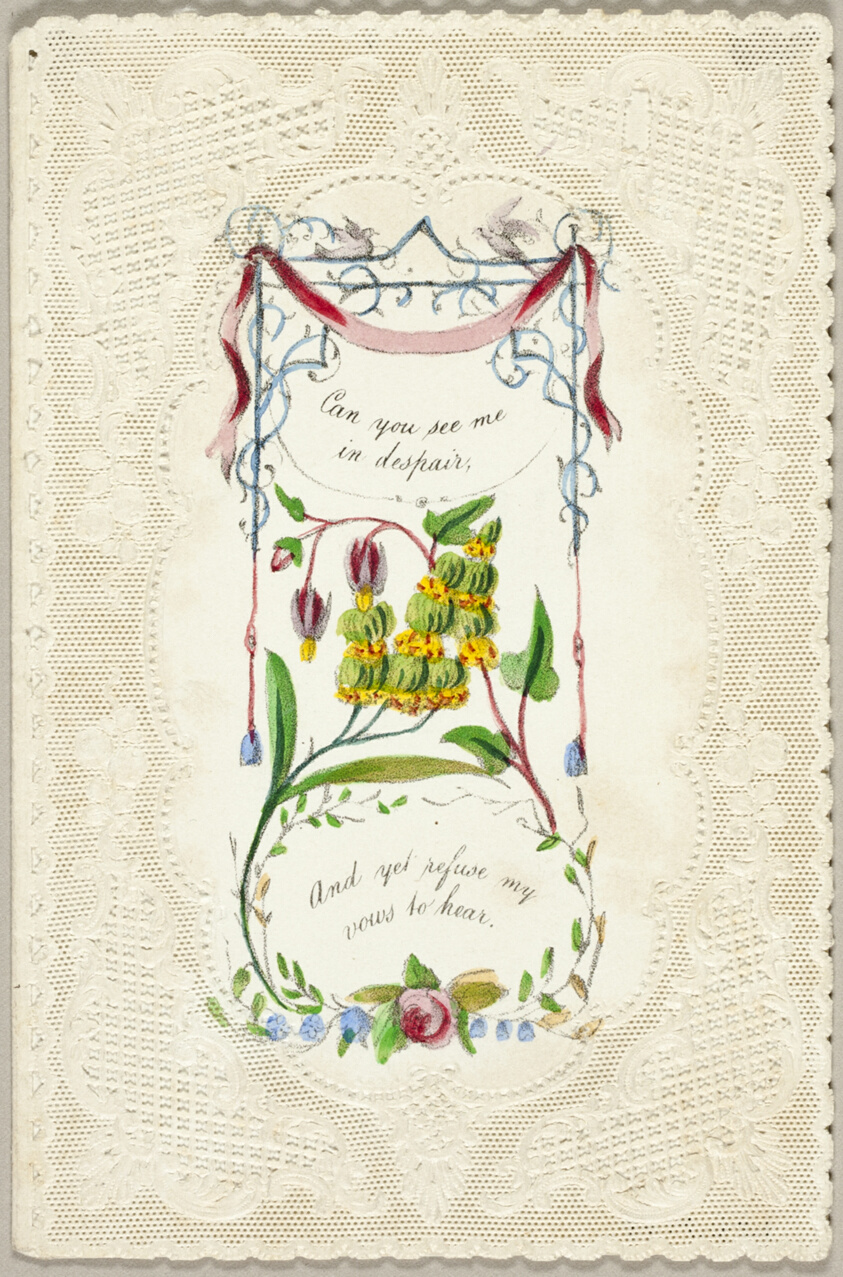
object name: Print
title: Can You See Me in Despair? (Valentine)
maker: George Meek (English, 19th century)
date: c. 1840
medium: Lithograph with hand-coloring on cut and embossed ivory wove paper (lace)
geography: England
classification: valentine; prints and drawing; print